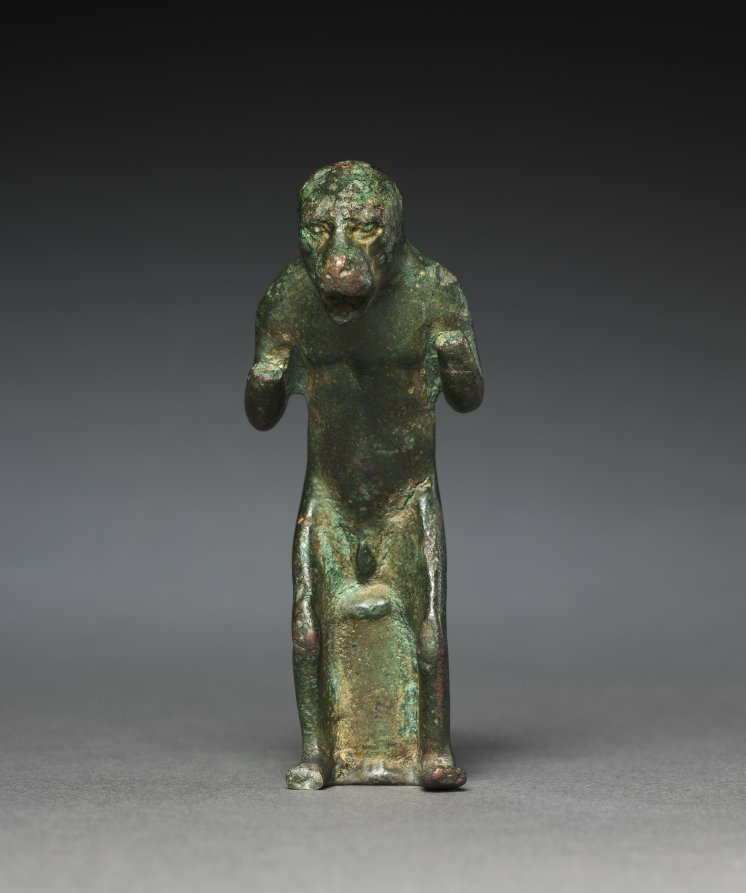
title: Baboon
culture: Egypt, Late period (715–332 BCE), Dynasty 26, Saite period (664–525 BCE)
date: 664–525 BCE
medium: bronze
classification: Sculpture